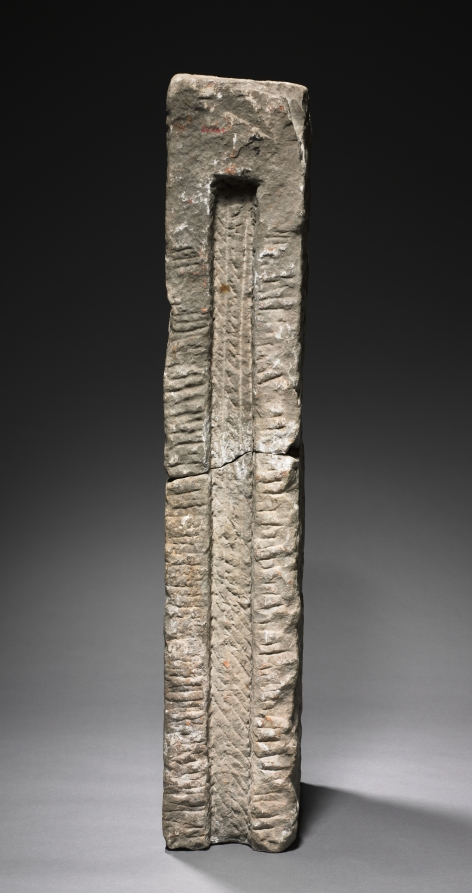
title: Transenna Post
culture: Lombardic, Italy, Rome, Migration period, 8th-9th Century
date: 700s-800s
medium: marble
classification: Sculpture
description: In Christian architecture a transenna is an openwork screen of stone or metal enclosing a shrine. These transenna elements were found in Rome; the posts were said to have been excavated on the Coelian Hill and may have originally formed part of the transenna of the Church of San Saba. The Lombards were an ancient Germanic-speaking tribe that settled in Italy after 568. Their artistic tradition was originally centered on small objects of personal adornment like buckles and brooches. After occupying Italy, the Lombards found themselves in contact with large-scale sculpture of classical and early Christian origin that, by the end of the 700s, they had learned to adopt and imitate, as seen here.